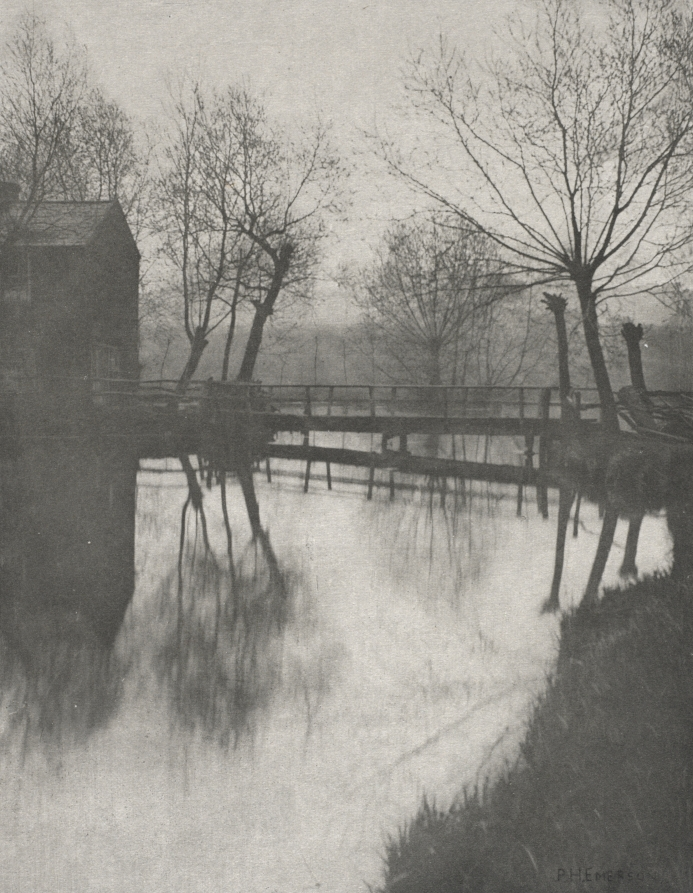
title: Footbridge Near Chingford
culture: England, 19th century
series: The Compleat Angler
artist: Peter Henry Emerson (British, 1856–1936)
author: Izaak Walton (British (modern), 1593–1683)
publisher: Sampson Low, Marston, Searle and Rivington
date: 1888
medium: photogravure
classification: Photograph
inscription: Written in ink on recto: "P.H. Emerson"; in pencil on verso: "17843.A", "pl. XXV"